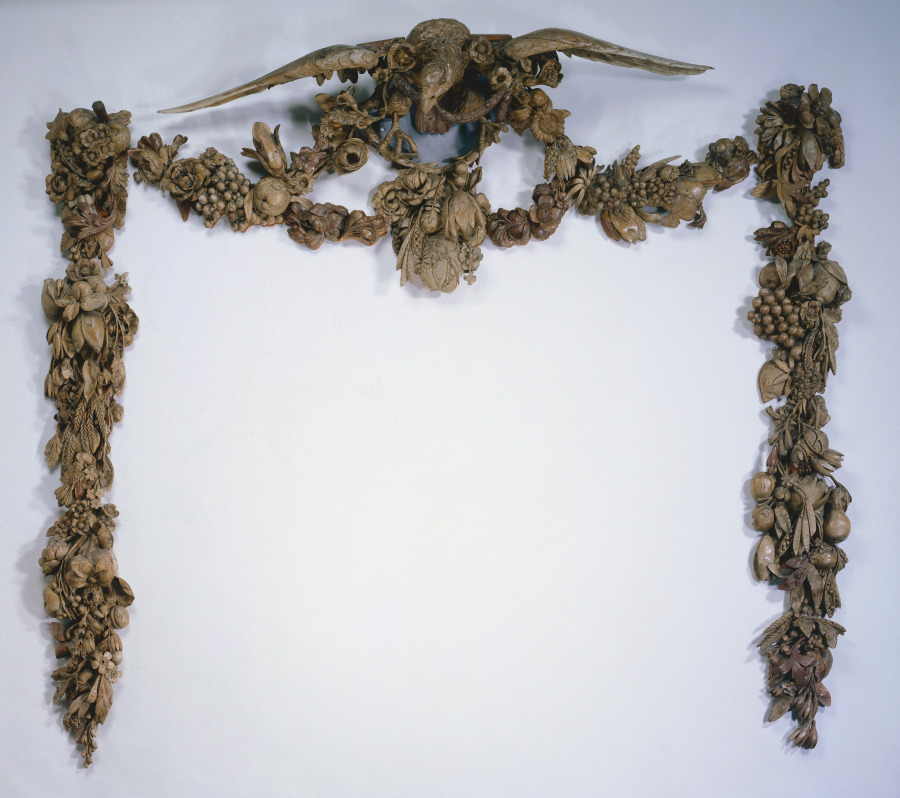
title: Overmantel Decoration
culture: England, 17th century (Charles II)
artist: Grinling Gibbons (British, 1648–1721)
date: c. 1675–77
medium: lindenwood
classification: Sculpture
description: The arrangement of architectural elements within grand interior spaces in the late 1600s and early 1700s emphasized symmetry and height. Decorative elements such as elaborately carved mantels, mirrors, paintings, and applied wall decorations were often stacked to achieve a visual focal point at one or both ends of the room. This particular overmantel decoration once hung above the fireplace in the Green Drawing Room of the Earl of Essex at Cassiobury in Watford, near London. In 1823, the British painter William Henry Hunt (1790–1864) produced a watercolor of the drawing room which featured this overmantel decoration. Grinling Gibbons was born in Rotterdam, the Netherlands, of English parents. After training there as an artist, he came to England in the 1660s and soon began to work as a sculptor of interior ornament, particularly in wood. One of his first large-scale decorative projects was the series of interiors at Cassiobury House.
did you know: The swags of fruit and foliage featured in this wooden overmantel decoration evoke the bounty of the English countryside.